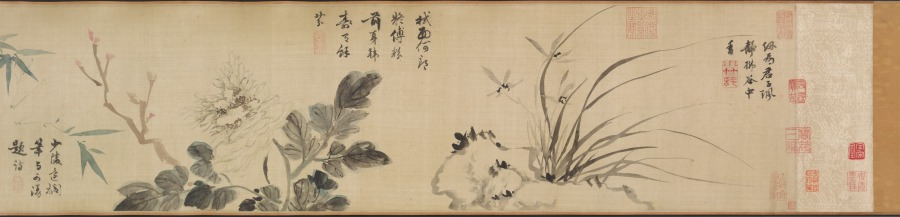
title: Flowers of Four Seasons, with Poems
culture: China, Ming dynasty (1368–1644)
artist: Wang Guxiang (Chinese, 1501–1568)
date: 1531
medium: handscroll; ink and light color on silk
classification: Painting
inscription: Artist's inscription, signature, and 15 seals. Ink Orchids. Sewn as pendants for the man of worth, swaying quiety, fragrance in the valley. [seal] Hsiao-chu ts'un Peony. Wiping his face, the young gentleman Ho [Ho Yen of Wei, Three Kingdoms] appears to have been powdered. His previous life was the perfume-stealing Han Shou [of Chin, 265–419 CE], the fragrance still lingers. [seal] Ts'un-wu chai. Flowering Crab Apple, New Bamboo. Shao-lin [Du Fu, 712–770] had to put down his brush. [Flowering Crab Apple]. Yü-k'o [Wen T'ung, d. 1079) in vain wrote poems about [Bamboo]. [seal] Yu-shih. Lotus Flowers. When she turns her head, half-hidden by a fan, and casts a glance, all the beautiful women become colorless. [seal] K'ang yüeh huai. Loquat. Ripeness in summer. [seal] Lu-chih. Pomegranate Flower. Whenever I remember you I will send my thoughts, but where have you gone--the [skirt] of pomegranate red? [seal] Wu-ho Sheng. Day Lily. Plant the day lily to forget sorrow. [seal] Yu-shih. Chrysanthemum. The untrammelled joy at the eastern fence. [seal] Lu-chih. Begonia. Comparing it to the beauties of Spring, and spreading them out as trimming for the stone steps. [seal] Yu-shih. Hibiscus. In recent years I have always enjoyed looking at flowers; instead of dark red I preferred pink ones. [seal] Jen-sheng i-lou. Narcissus, Camellia. The jade girdle left behind at Lo River. [Narcissus]. The precious pearls glitter before Spring. [Camellia]. [seal] Lu-chih. Heavenly Bamboo (Nandina domestica). A single branch in the wintry season. [seal] K'ang yüeh huai. Plum. Fragrant snow in the Lo-fou Mountains. [seal] Ts'un-wu chai. In the eleventh lunar month of the hsin-mao year of the Jiaqing era [1531], [I] imitated the boneless style of Yüan masters in sketching from life. Guxiang [seals] Yu-shih; Lu-chih. Translated by Wai-kam Ho/Lingyun Shih Liu (1980)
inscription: 2 colophons and 23 additional seals: 1 colophon dated 1632, and 2 seals of Li Jih-hua [Li Rihua] 李日華 (1565–1635); 1 colophon and 2 seals of Xiang Shengmo 項聖謨 (1597–1658); 3 seals of Liang Qingbiao 梁清標 (1620–1691); 6 seals of the Jiaqing 嘉慶 emperor (r. 1796–1820); 9 seals of Ch'eng Ch'i [Cheng Qi] 程琦 (1911–1988)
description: In this painting, flowers are loosely arranged by the seasons: narcissus and peony represent early spring; yellow loquat and lotus, summer; chrysanthemum, autumn; and the plum and evergreen bamboo, winter. The artist added to each flower a poetic line of calligraphy associating each plant with a historic or legendary figure. For example, the chrysanthemum, along with the line “The untrammeled joy at the eastern fence,” refers to the poet Tao Yuanming (died AD 427) who enjoyed chrysanthemums at the eastern fence in his garden. The scroll illustrates Wang Guxiang’s mastery of free brushwork, combining light monochrome ink with transparent colors. In his inscription, Wang says he used the “boneless” style without outlines as developed during the Yuan dynasty (1279–1368). Wang was a native of Changzhou, a city in southeast China known for its rich flora and fauna, and flower-and-bird painting tradition.